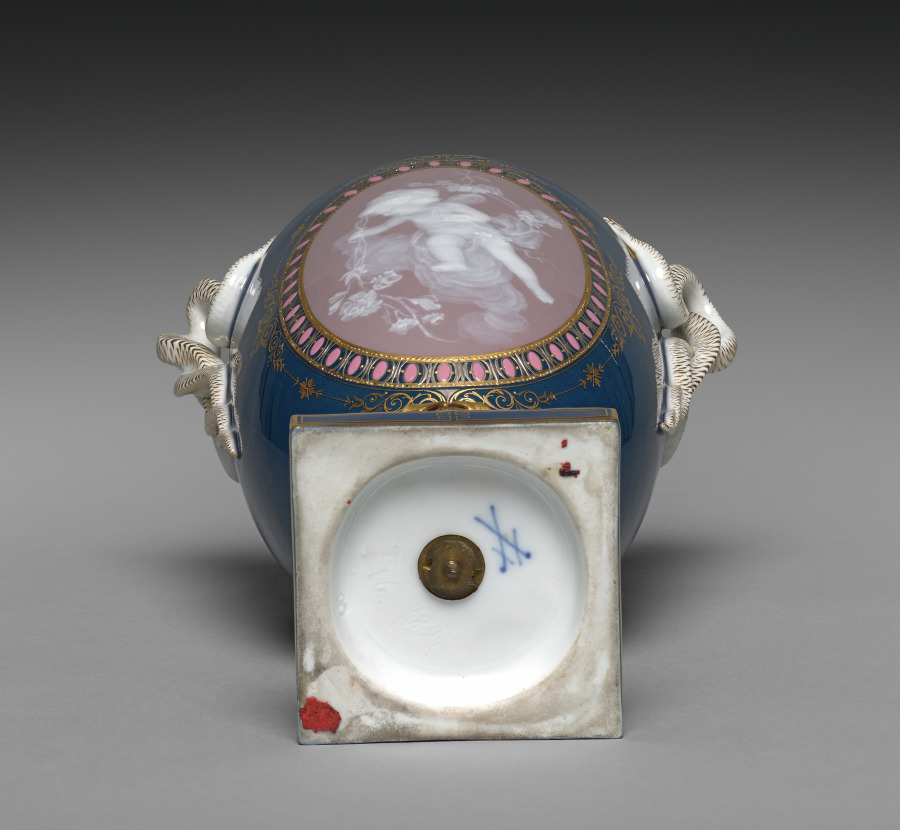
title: Vase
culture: Germany, 19th century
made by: Meissen Porcelain Factory (German, est. c. 1710)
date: 1881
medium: porcelain with pâte-sur-pâte decoration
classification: Ceramic